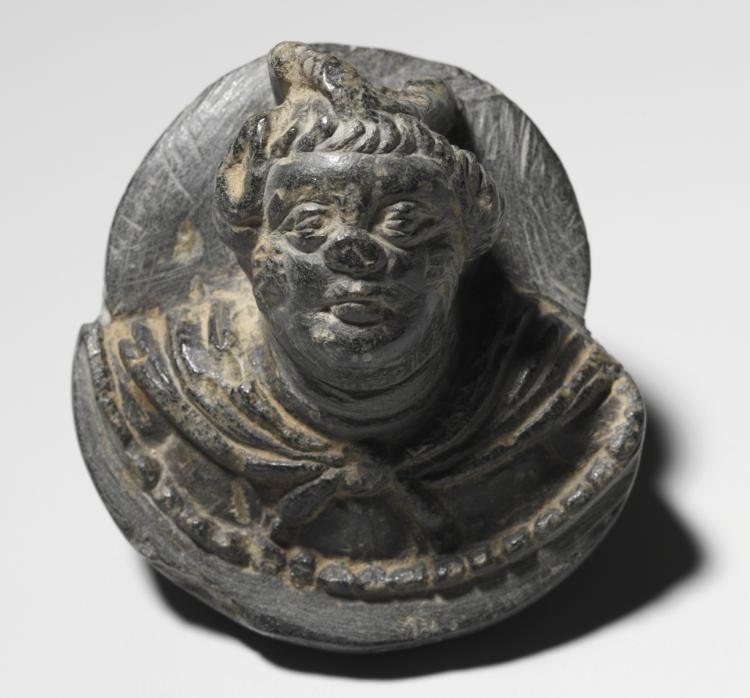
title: Plaque with a Male Head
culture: Pakistan, Gandhara, Kushan period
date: 100s CE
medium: gray schist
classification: Sculpture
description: This small schist plaque is decorated with the bust of a man. It may have been used in several different ways—for example, like the roundels with highly projecting heads that have been reproduced by Marshall as door knockers, reverse sides of hand mirrors, and so on. Although they are made of bronze, this does not preclude that this schist plaque may have been set in a metal mount. There is also a precedence for objects of this type among the Begram plaster emblemata and terracottas, which may have served for making molds in clay, from which the metal sculpture was then made. There is even a chance that the object may have been used as a lid on a vessel and that the projecting head of the image would serve as a handle. The bust is that of a middle-aged man with his hair pulled up in a chignon. His broad face reveals the somewhat pudgy, coarse features of a well-to-do individual. He wears a scarf around his neck, tied in a knot with loosely hanging ends, the same as one finds on some sculptures of attendants of Buddha in Mathura. This seems to imply either a secular personage or possibly a Bodhisattva. The bottom edge of the bust is decorated with a bead pattern.